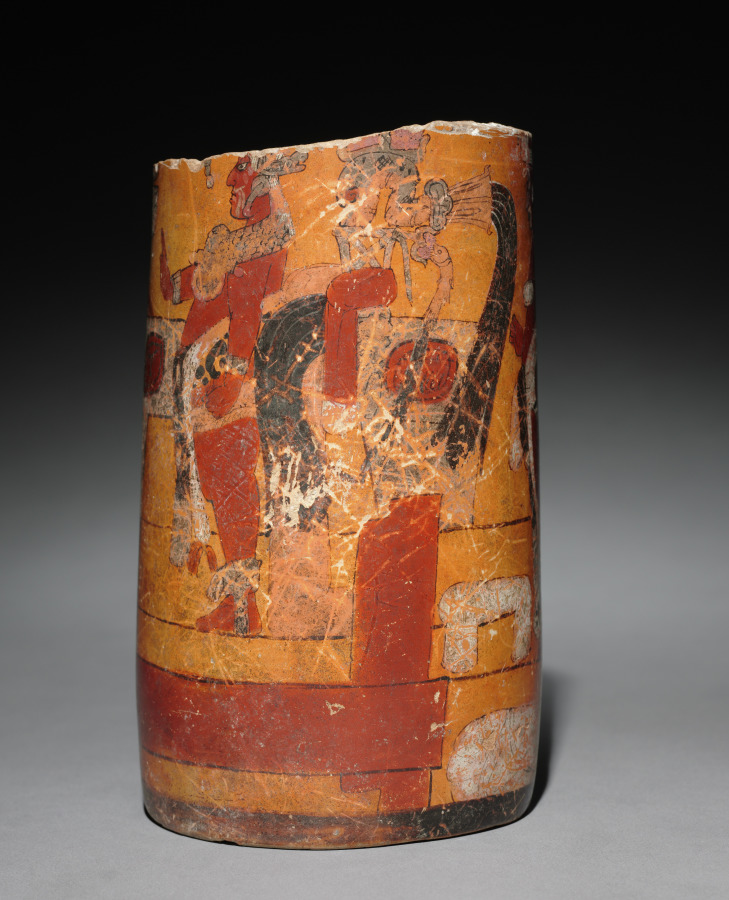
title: Cylindrical Vessel with Palace Scene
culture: Mexico or Central America, Maya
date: 600–900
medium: earthenware with colored slips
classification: Ceramic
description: The scene here may commemorate a special event in the life of a Maya ruler, who stands on a stairway before his throne, his legs framed by a litter on the ground. His gesture and the jaguar pelt at the waist visually unify him with his attendants. The ruler perhaps used the vessel as a drinking cup on important occasions; fine ceramics also served as gifts and as offerings in tombs.